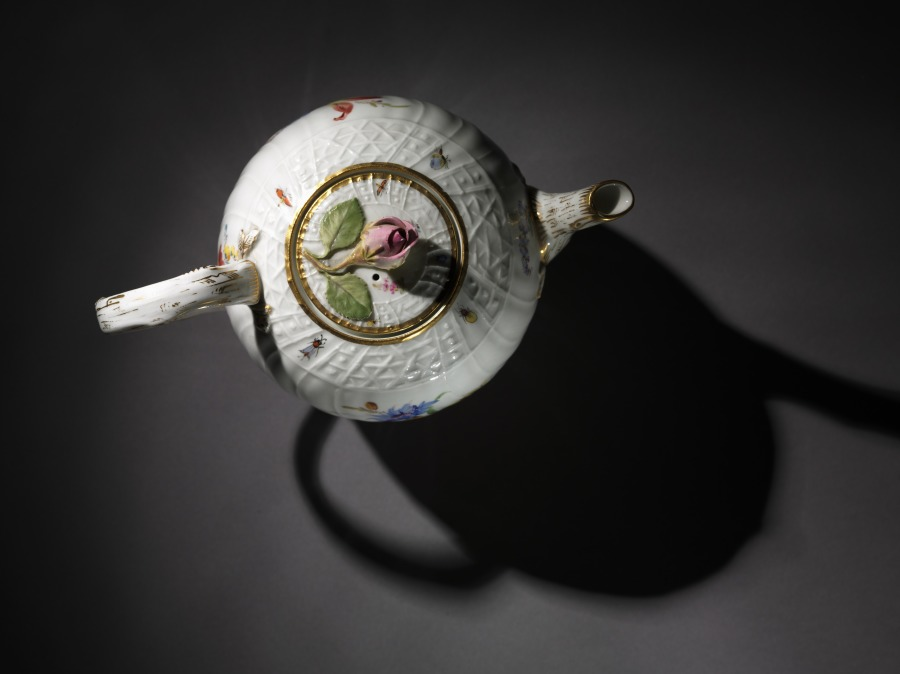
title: Teapot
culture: Germany, Meissen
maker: Meissen Porcelain Factory (German, est. c. 1710)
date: c. 1750–70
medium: porcelain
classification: Ceramic